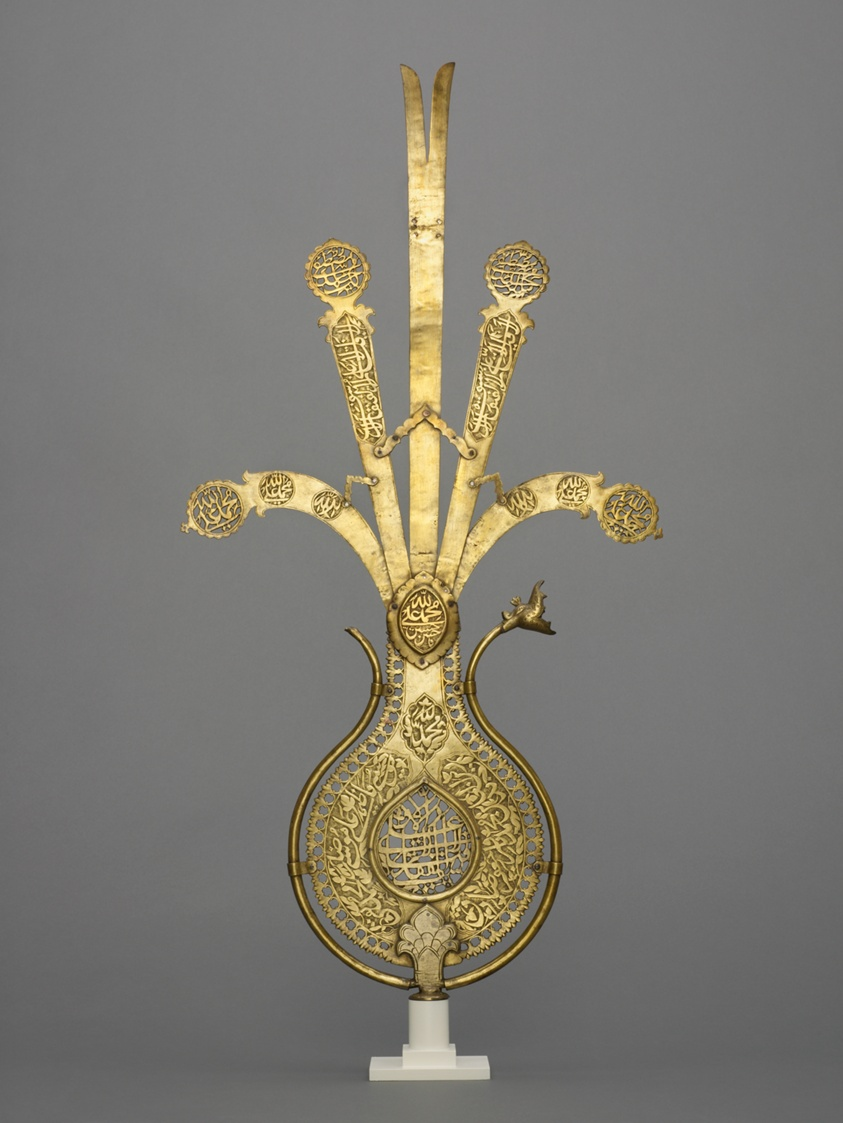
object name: Religious/Ritual Object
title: Ceremonial Standard ('Alam)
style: South Asian, Indian (South Asian)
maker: India; Deccan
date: 17th/18th century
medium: Brass with pierced and engraved decoration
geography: India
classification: brass; metalwork; asian art; ritual objects